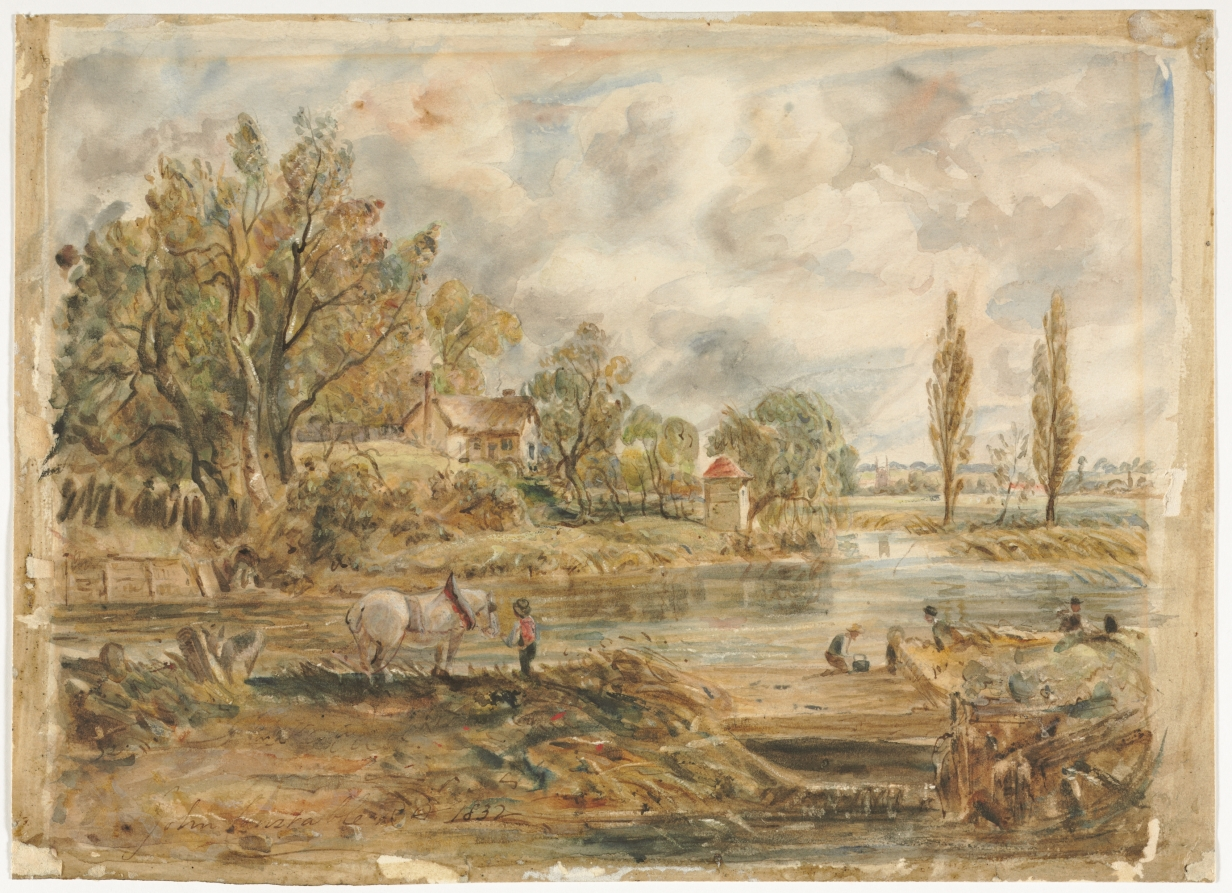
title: The White Horse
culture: England, 19th century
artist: imitator of John Constable (British, 1776–1837)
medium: watercolor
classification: Drawing